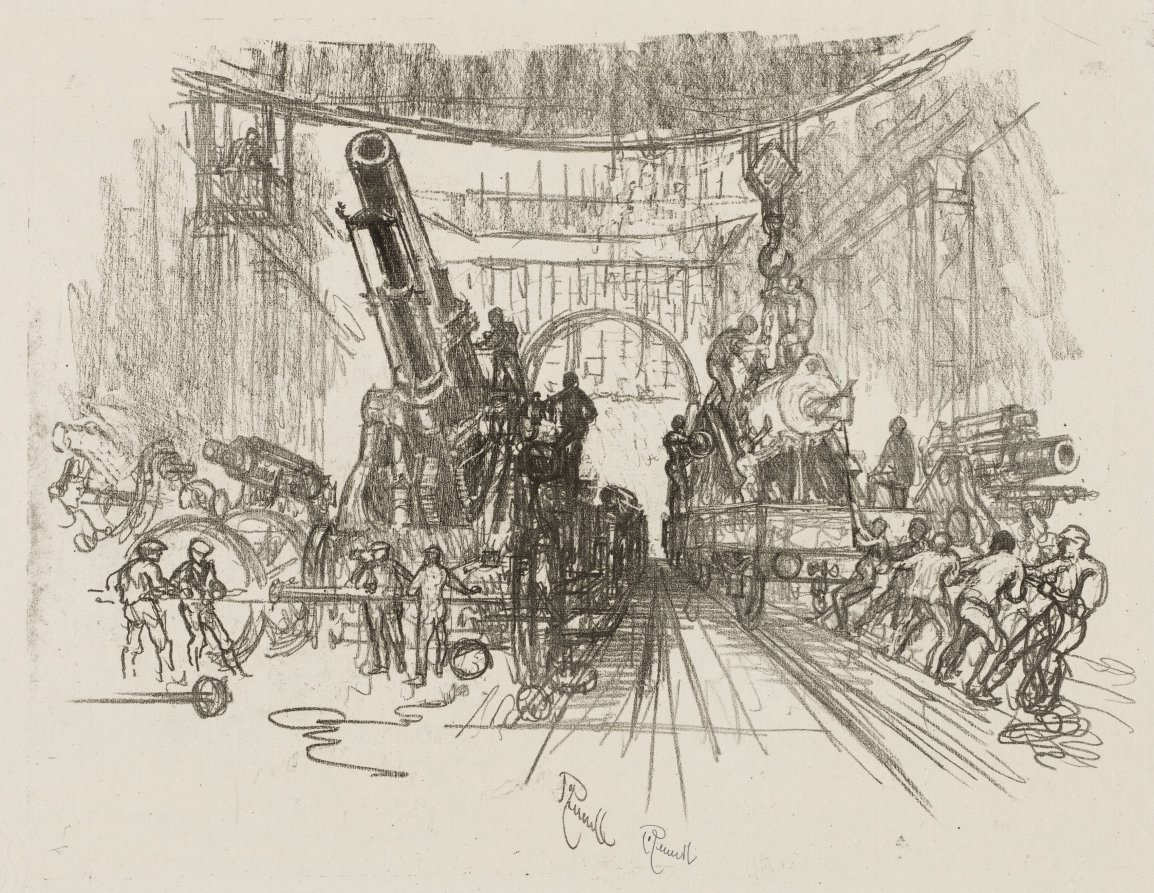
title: English War Work: Ready for War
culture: America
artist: Joseph Pennell (American, 1857–1926)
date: 1916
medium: lithograph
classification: Print